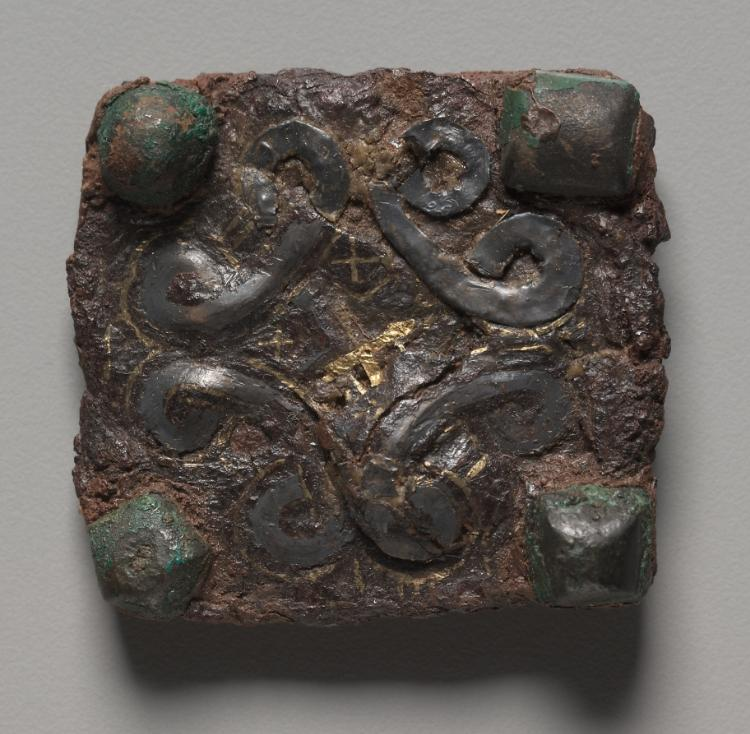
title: Plaque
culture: Merovingian, Burgundian, Migration period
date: 600s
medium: iron with gold and silver overlay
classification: Jewelry